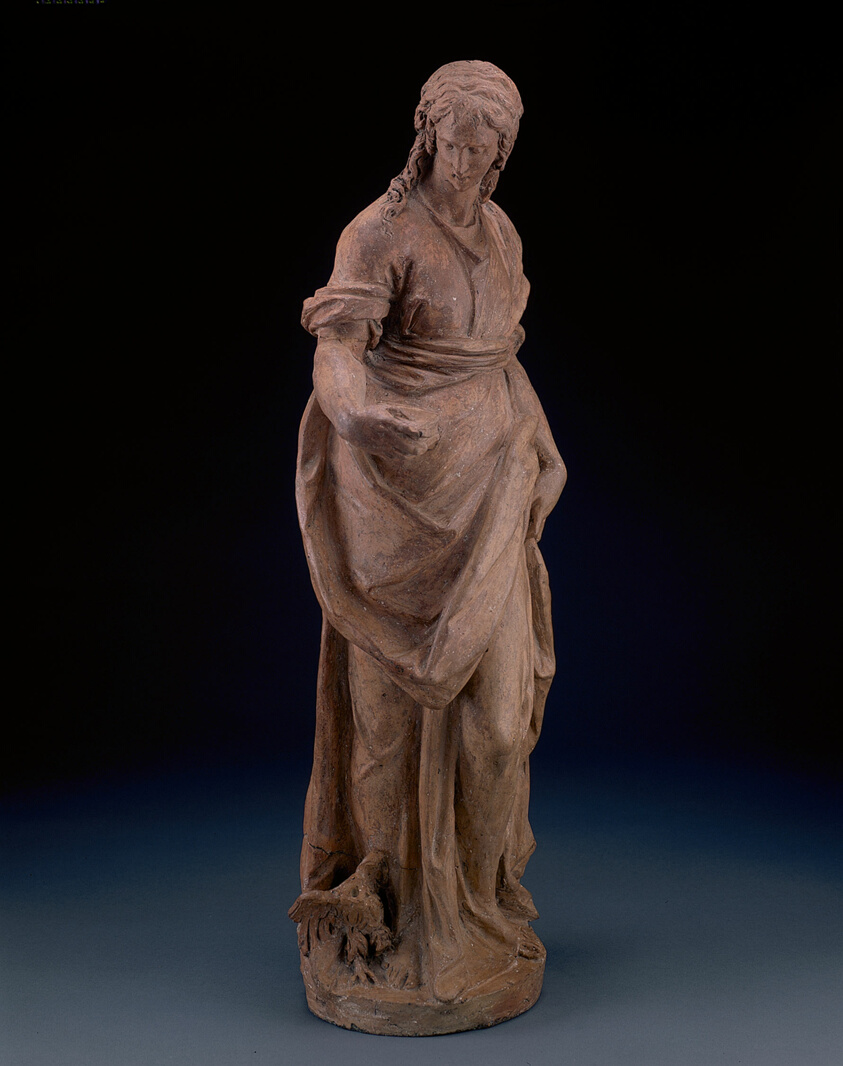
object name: Sculpture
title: One of the Set of the Four Evangelists: John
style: sixteenth century, 16th Century, Renaissance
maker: Alessandro Vittoria (Italian, 1525–1608)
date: Modeled c. 1580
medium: Terracotta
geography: Italy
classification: sculpture; statuette; figure; Italian; terracotta (sculpture)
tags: religious figures, Christian subjects, Christianity, Devotion, figure, figures, man, men, religion, religious